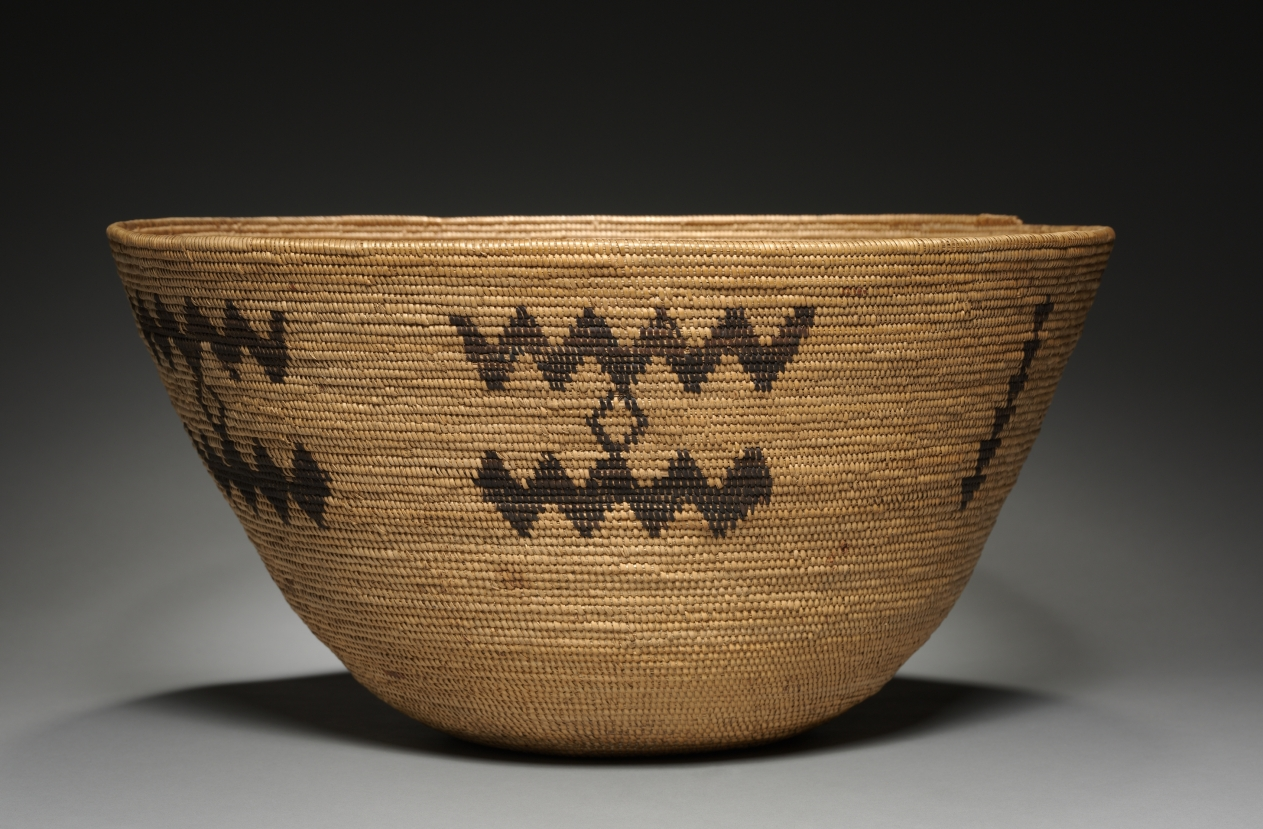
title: Food or Carrying Bowl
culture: California, Pala Band Luiseño, Pala Mission, late 19th - early 20th century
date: late 1800–early 1900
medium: coiled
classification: Basketry